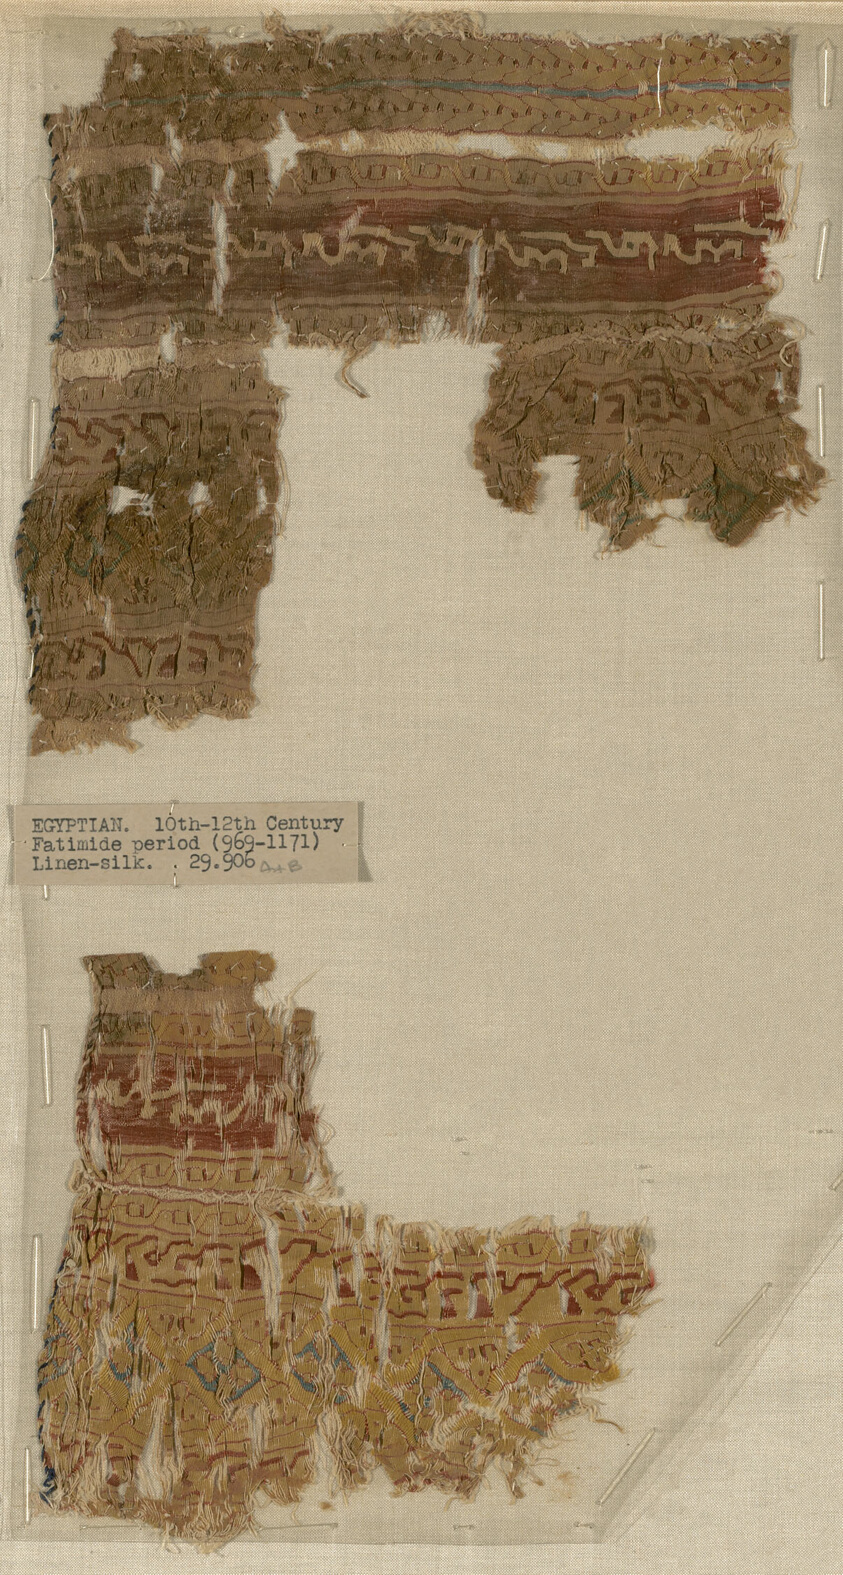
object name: Textile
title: Fragments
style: fatimid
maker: Egypt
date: Fatimid period (969–1171)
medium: Linen and silk, tapestry weave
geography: Egypt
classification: textile; weaving